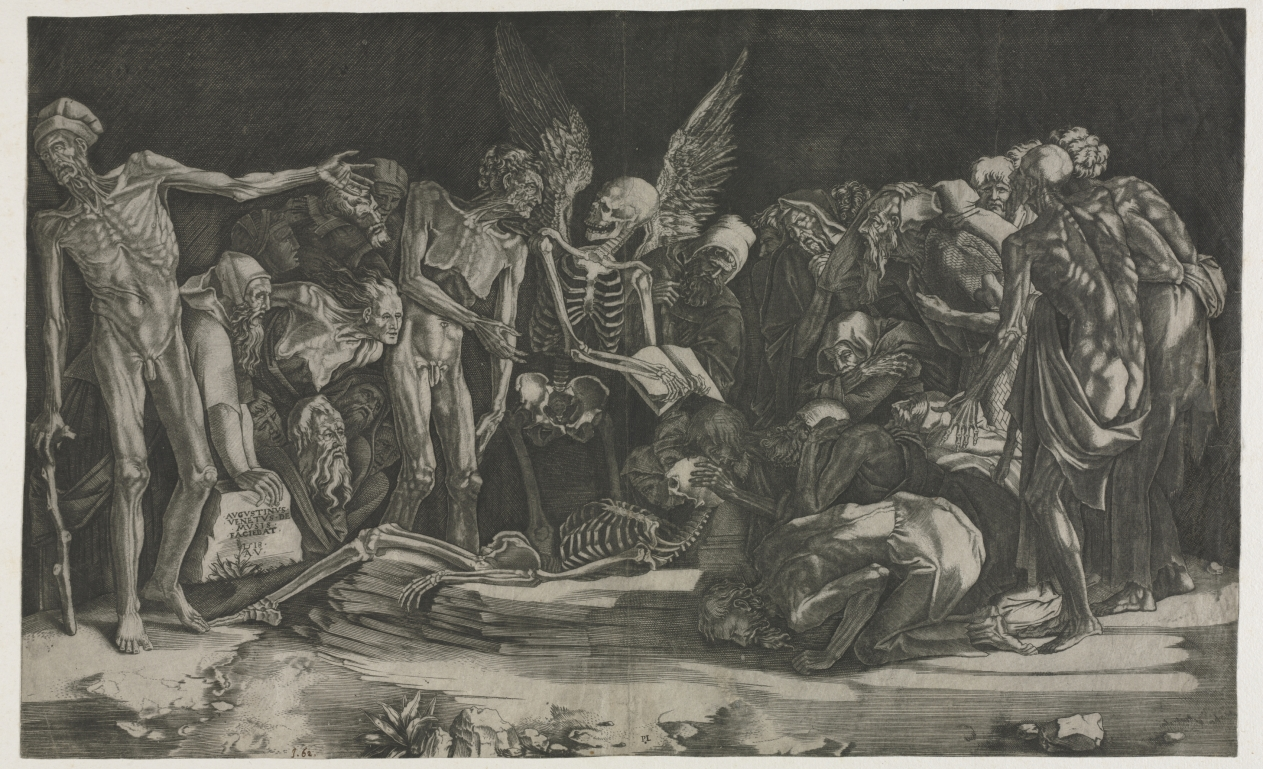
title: Skeletons, also known as Allegory of Death and Fame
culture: Italy, 16th century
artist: Agostino Veneziano (Italian, 1490–1540)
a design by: after Rosso Fiorentino (Italian, 1494–1540)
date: 1518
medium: engraving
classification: Print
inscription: lower left, in plate: ·AUGUSTINUS· / ·VENETUS·DE· / ·MUSIS· / FACIBAT· / 1518· / ·A·V· ; lower left, in pen and brown ink: J. 62.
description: Although for centuries scholars have attempted to understand the allegorical meaning of this print, 16th-century artist and author Giorgio Vasari described it simply as “an anatomy of desiccated nudes and of bones of the dead.” A central figure of winged Death stands over an interred skeleton, surrounded by a variety of skeletal and living human figures who appear to debate the fate of the soul. At far left is a “marasmic” man, a type of sun-dried body used by anatomists to study the muscles without removing the skin. Rosso Fiorentino, who designed the composition of this print to be engraved by Agostino Veneziano, was a Florentine contemporary of Michelangelo who planned a book on anatomy that was never published.